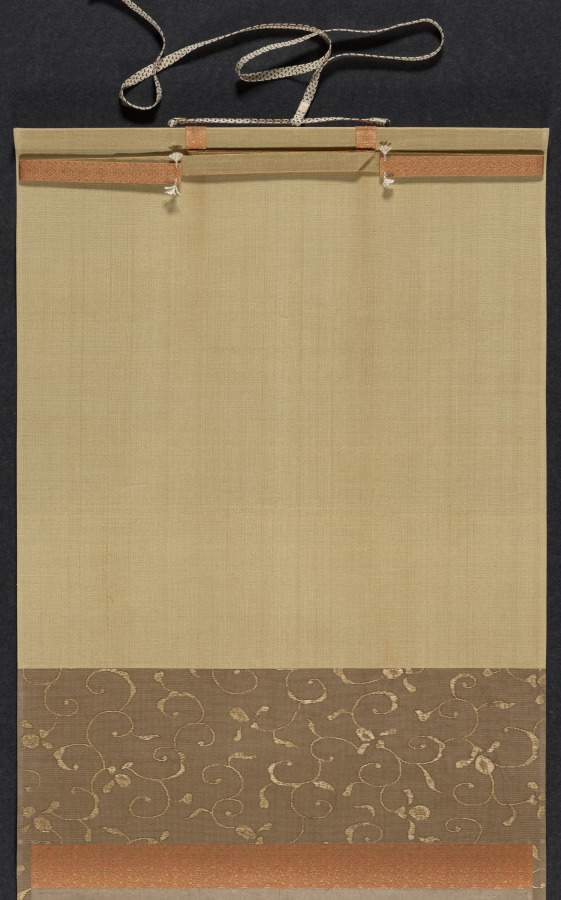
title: Bodhidharma Crossing the Yangzi on a Reed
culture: China, Yuan dynasty (1271-1368)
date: 1300s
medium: hanging scroll; ink on paper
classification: Painting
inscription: 蘆花風起浪頭高，少室岩前去路遙。/ 劫外一花開五葉，腳跟正好喫藤條。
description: Chan Buddhism was introduced to China in the early 500s by the Indian monk Bodhidharma, or Puti Damo (died before 534). Upon his arrival in China, Bodhidharma was allegedly granted an audience with the Liang dynasty emperor Wu (reigned 502–49). Realizing the emperor did not understand his mission, the monk left Nanjing, crossed the Yangzi on a reed, and settled north in Henan province’s Shaolin monastery. Here, Bodhidharma is sketched in few pale brushstrokes. The diluted and swift lines on an empty ground emphasize the Chan idea that all things are illusionary. The inscription reads: Wind rises from the reed flowers, the waves are high; It’s a long way to go beyond the cliff of the Shaoshi mountain; Above the worlds of kalpas a flower is opening into five petals; So that your barefoot heels are just fine for the whipping rattans. —translated by Wai-Kam Ho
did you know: Barefooted Bodhidharma sails across the Yangzi River balanced on a thin stalk of reed.